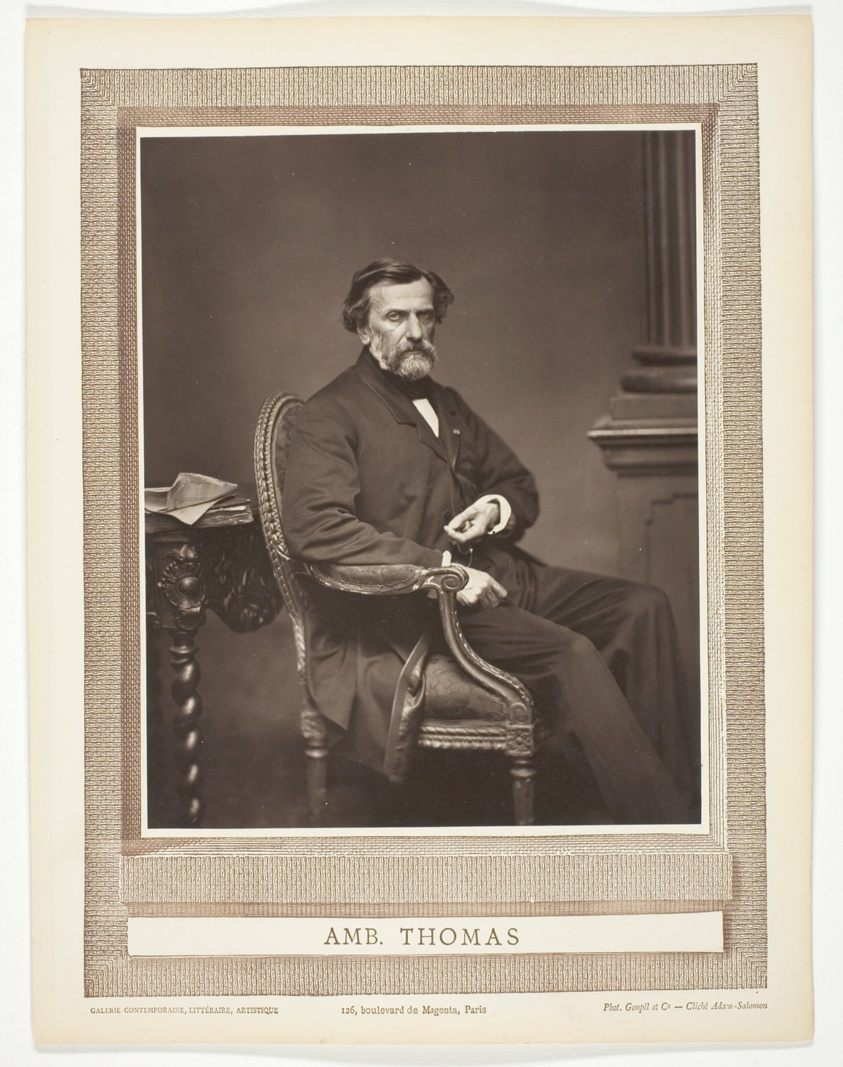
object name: Photograph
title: Amb. Thomas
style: 19th century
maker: Antoine Samuel Adam-Salomon (French, 1811–1881)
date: 1876/84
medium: Woodburytype, from the periodical “Galerie Contemporaine Littéraire, Artistique” (1876), volume 1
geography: France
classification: woodburytype; photomechanical process; photography; photograph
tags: Collected by Hugh Edwards, Contemporaine Littéraire